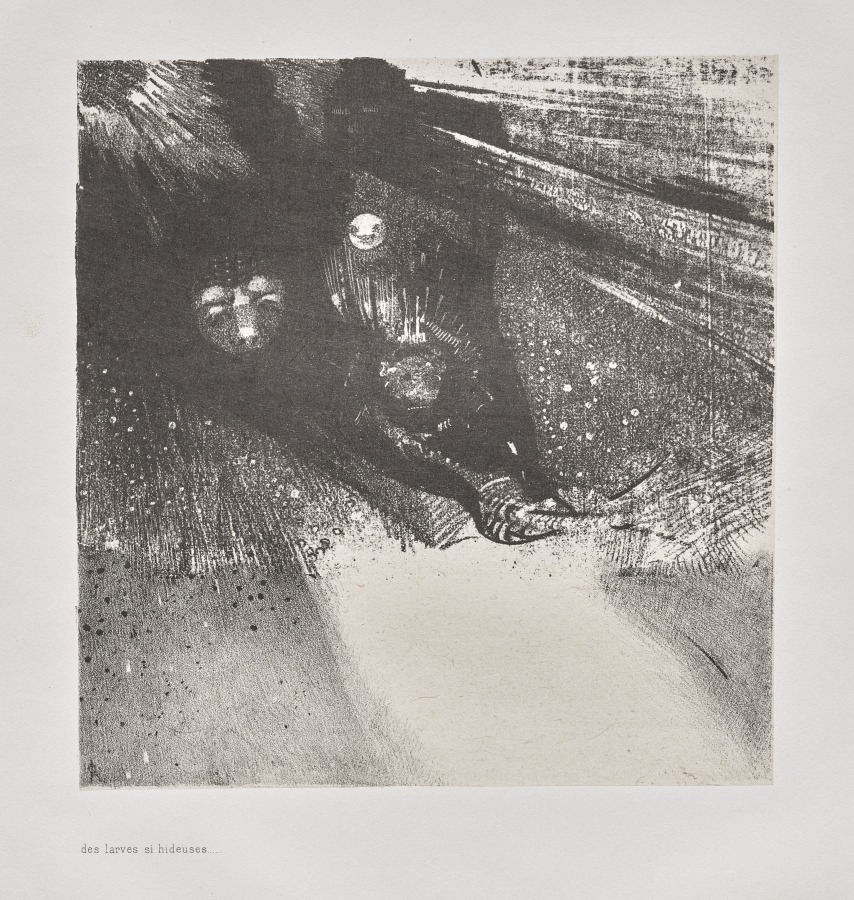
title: Hideous Larvae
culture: France, late 19th Century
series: The Haunted House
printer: Auguste Clot (French, 1858–1936)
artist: Odilon Redon (French, 1840–1916)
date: 1896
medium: lithograph on China paper laid on wove paper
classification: Print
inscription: printed at lower left, below image: des larves si hideuses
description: Odilon Redon was a voracious reader of contemporary literature, and such texts often influenced his art. This series was inspired by The Haunted and the Haunters, an 1859 novel by British writer Edward Bulwer-Lytton. Redon’s prints capture the book’s mysterious tone and emphasis on the supernatural through vague but evocative imagery that sometimes borders on abstraction. By this time a seasoned expert in lithography, the artist collaborated with master printer Auguste Clot. Their combined technical skills allowed for the rich tonal variation seen here, made by turning Redon’s lithographic crayon on its side, layering various marks, and even scratching directly into the surface of his stone.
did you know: One of Redon's greatest patrons, the occultist René Philipon, commissioned this portfolio as a supplement for his French translation of Bulwer-Lytton's The Haunted and the Haunters.